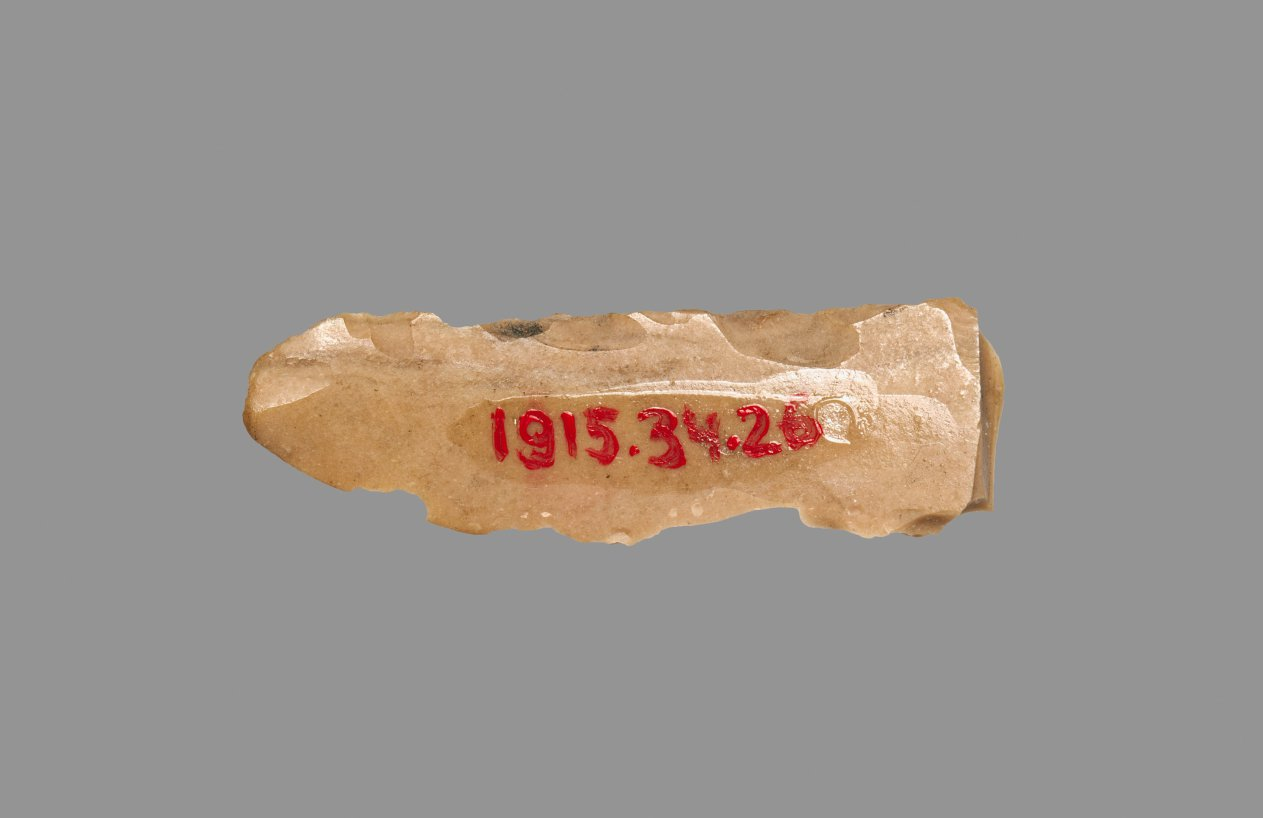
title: Sickle Blade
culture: Egypt, Middle Kingdom (2040–1648 BCE), Dynasty 12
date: 1980–1801 BCE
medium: flint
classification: Implements